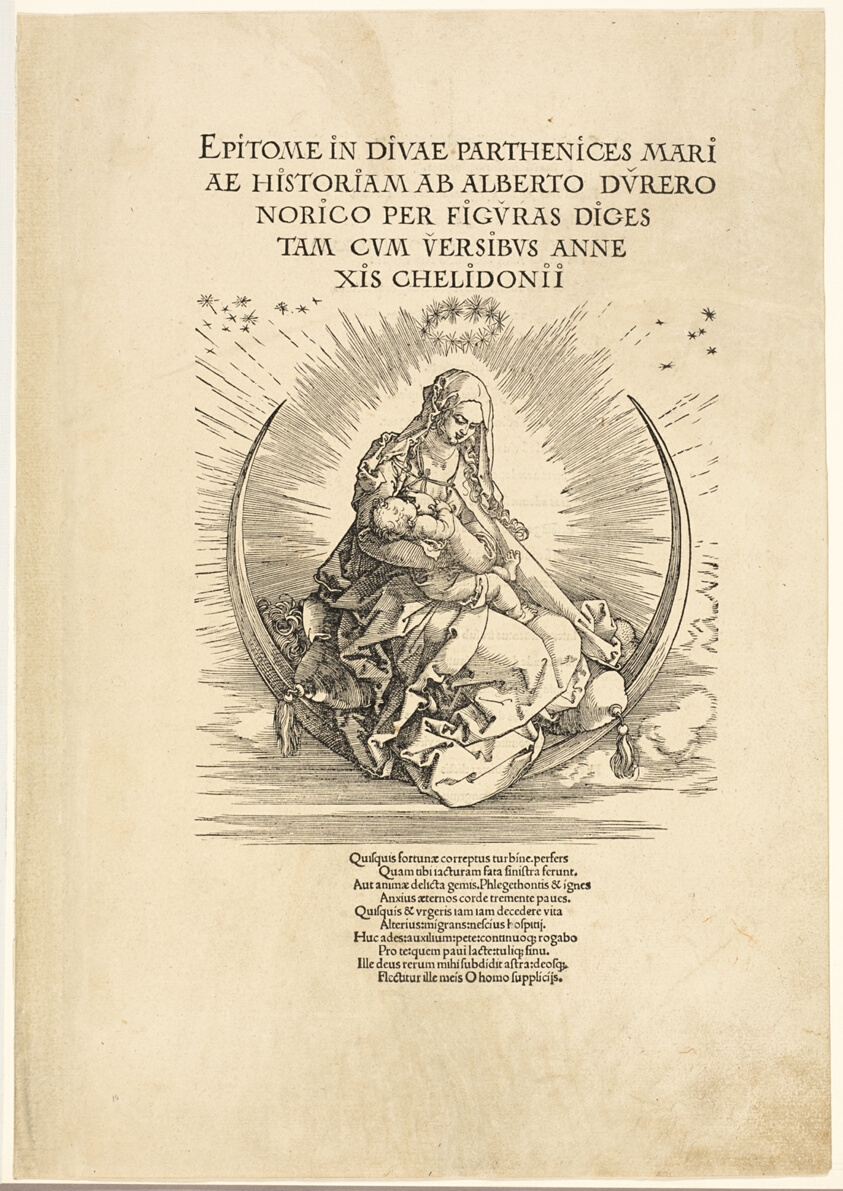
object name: Print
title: The Virgin on the Crescent, from The Life of the Virgin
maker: Albrecht Dürer (German, 1471-1528)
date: c. 1511, published 1511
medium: Woodcut in black on tan laid paper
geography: Germany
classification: woodcut; print; prints and drawing; paper